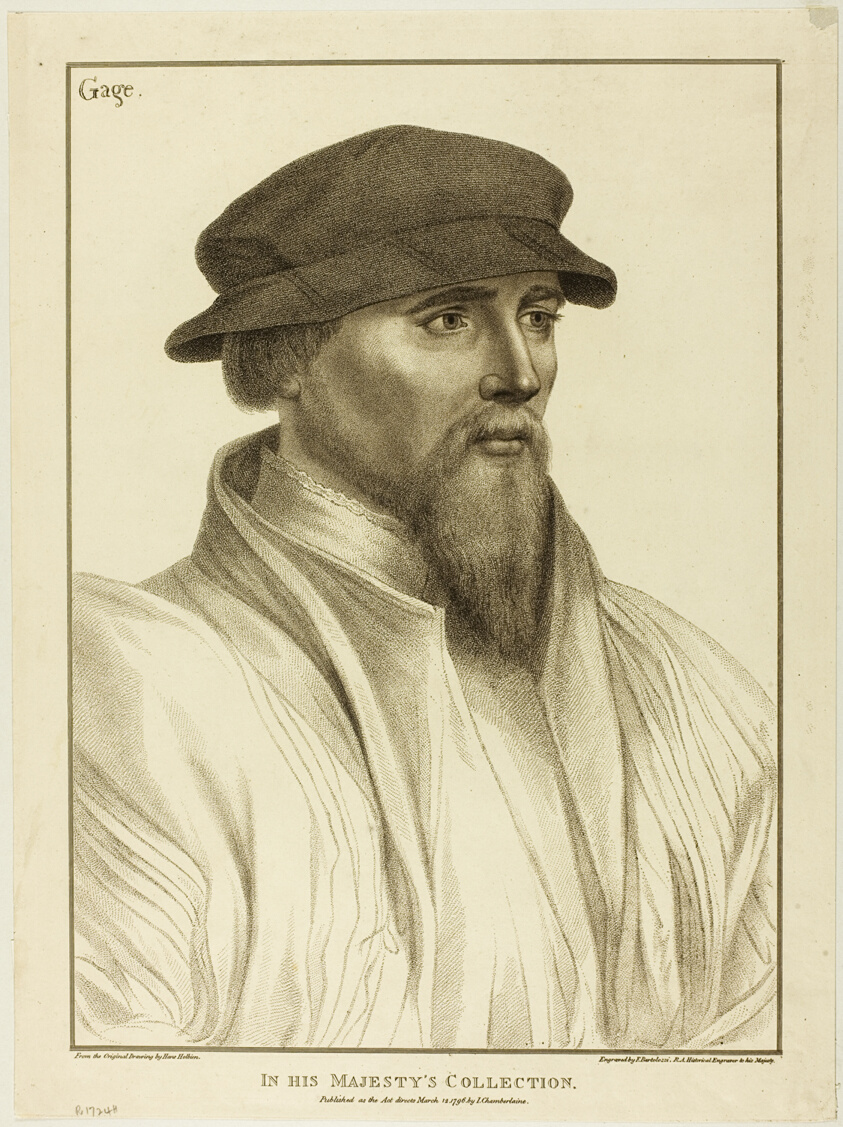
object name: Print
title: Sir John Gage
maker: Francesco Bartolozzi (Italian, 1727-1815); after Hans Holbein the younger (German, 1497-1543)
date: March 12, 1796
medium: Stipple engraving on cream wove paper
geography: Italy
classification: engraving; print; prints and drawing